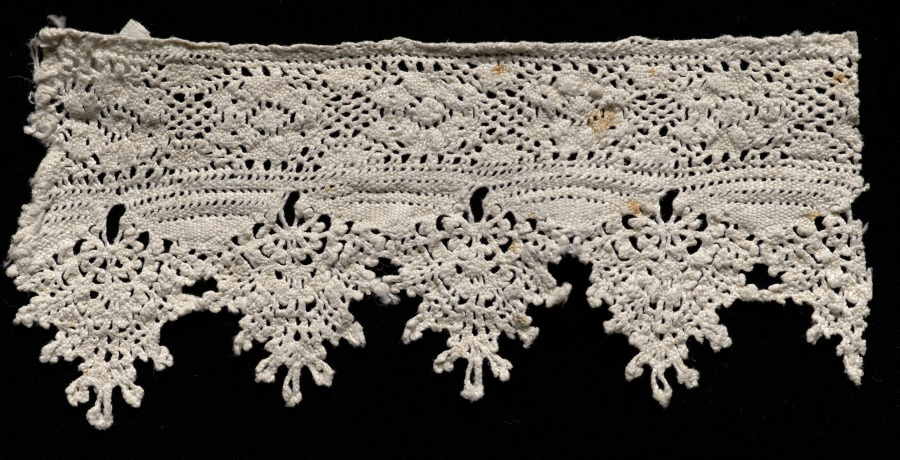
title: Lace Fragment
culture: Italy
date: 1600s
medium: Needle lace (punto avorio or ivory stitch) insertion and edging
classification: Lace